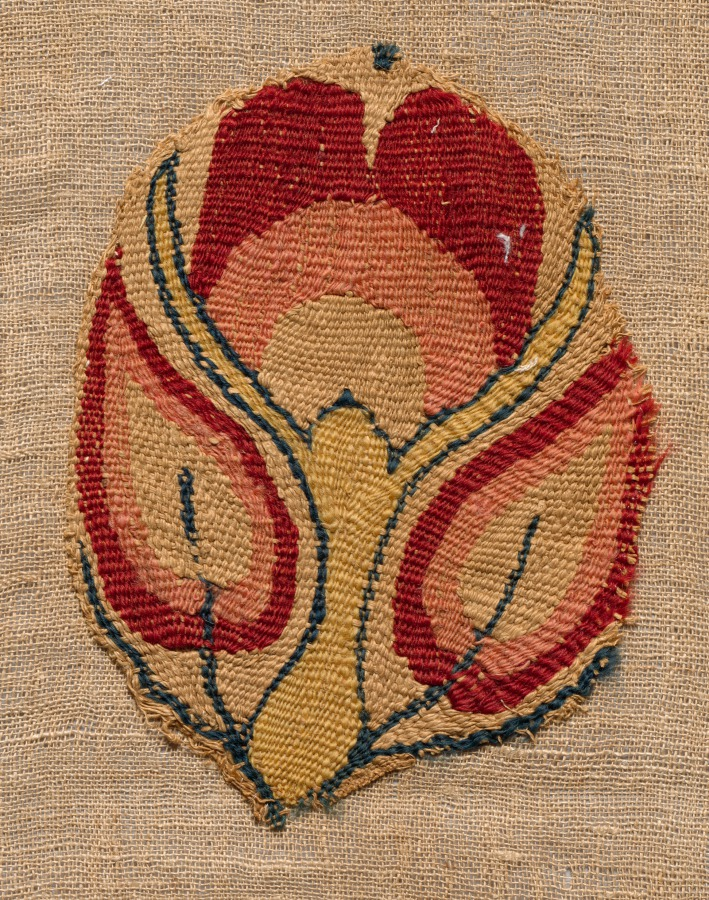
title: Fragments from a Curtain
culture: Egypt, Byzantine period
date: 300s–500s CE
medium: tapestry (originally inwoven in tabby ground, applied to plain tabby linen); linen and wool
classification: Textile